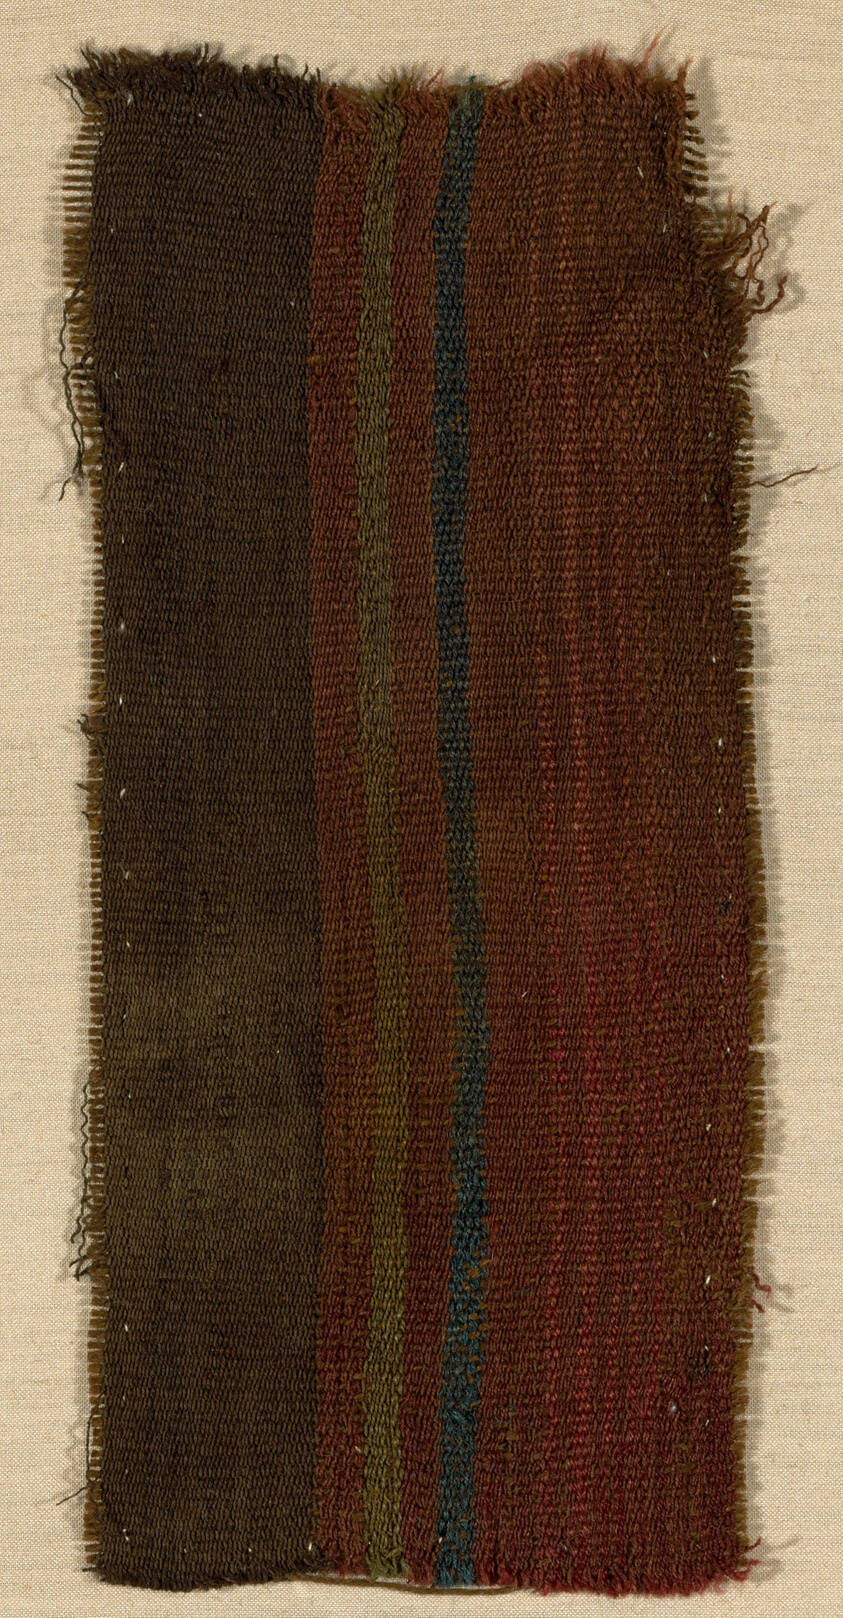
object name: Textile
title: Fragment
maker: Peru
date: 1–1532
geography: Peru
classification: textile; weaving